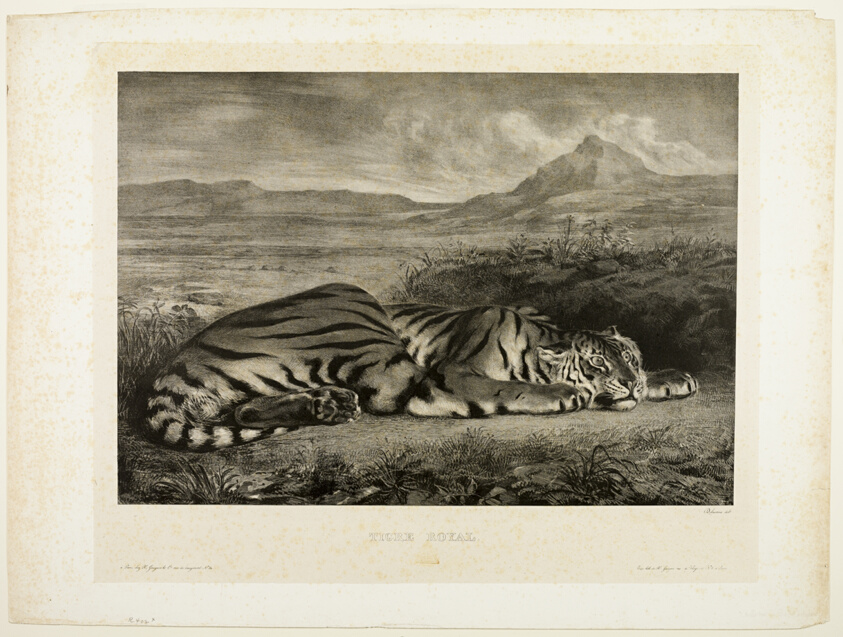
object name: Print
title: Bengal Tiger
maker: Eugène Delacroix (French, 1798-1863); printed by E. Ardit (French, active 1828-1834)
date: 1829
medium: Lithograph in black on light gray China paper laid down on ivory wove paper (chine collé)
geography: France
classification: lithograph; print; prints and drawing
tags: cats, animals